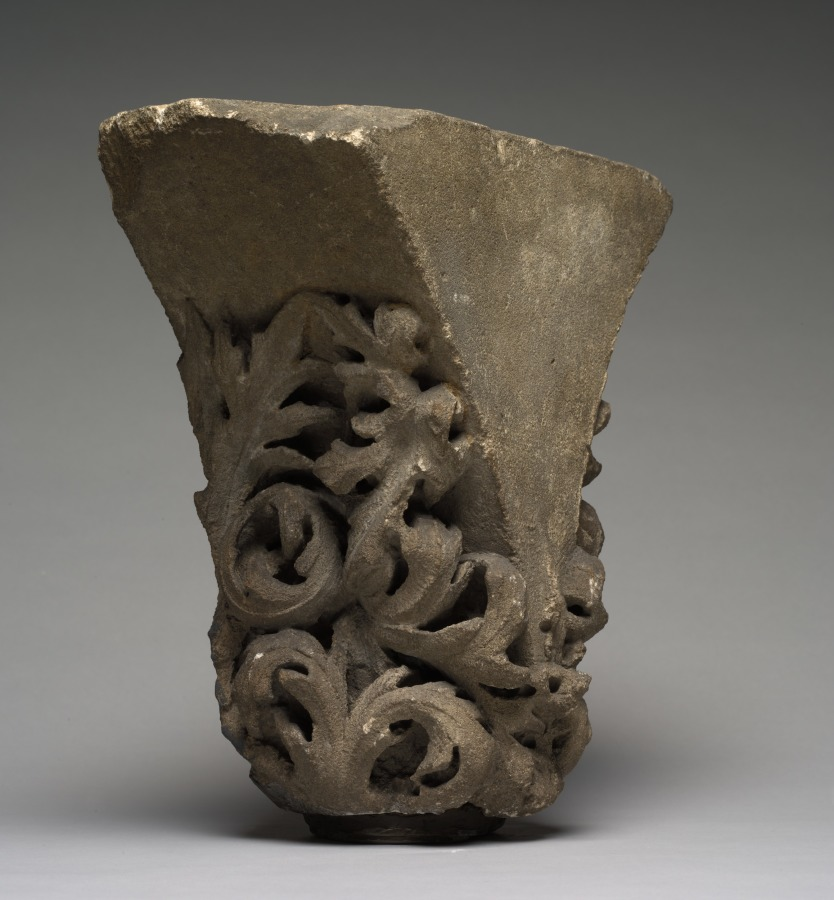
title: Architectural Fragment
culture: France, 15th century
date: 1400–1450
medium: stone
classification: Sculpture